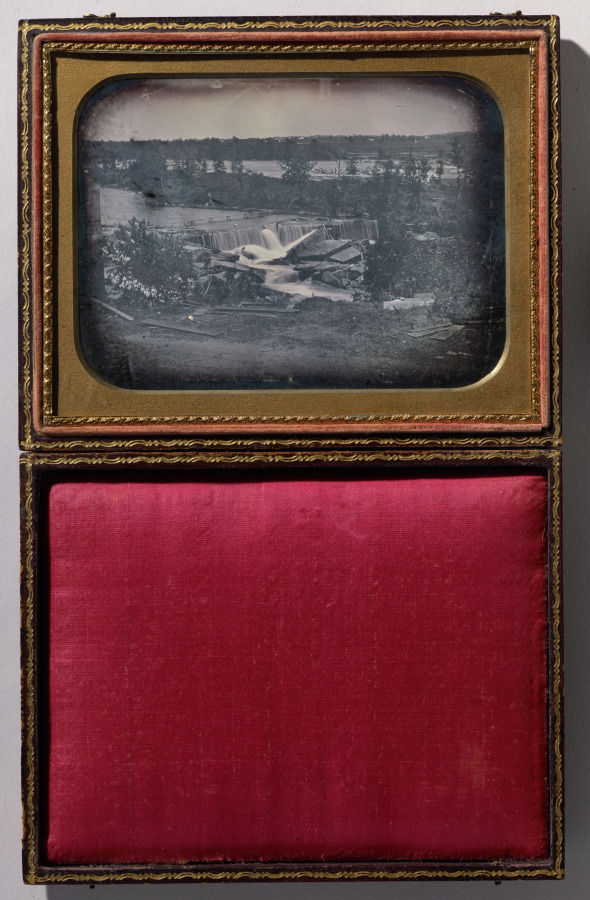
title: St. Anthony Falls from Across the River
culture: America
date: c. 1853–54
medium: daguerreotype, half-plate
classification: Photograph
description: In this image of St. Anthony Falls, the unidentified daguerreotypist made an "instantaneous view" of a remarkable natural wonder, rendering its specific geological formation with exacting clarity. Above a narrow channel where the Mississippi River runs between steep bluffs in Minneapolis, Minnesota, the falls churns away at the bedrock over which it descends. Named by Father Louis Hennepin during his travels in 1680, it is the only significant waterfall on the entire Mississippi River. The specific motivations of the photographer remain unknown. He or she may have wished the photograph to be scientific and documentary, a valuable visual aid for an artist, or just a reminder to a curious resident. No doubt, this daguerreotype was a rare image of the environment's unspoiled condition before the mid 1850s, when demand for an inexpensive energy source irreparably changed this area from a natural to industrial landscape.